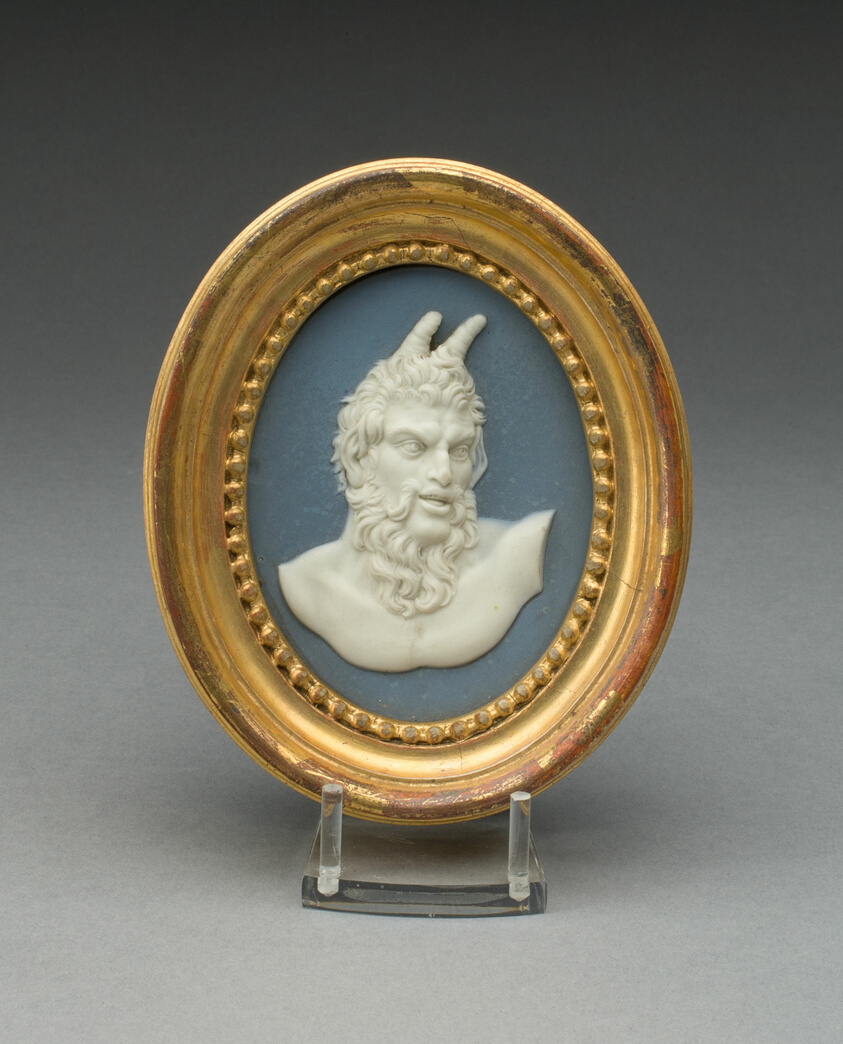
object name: Ceramics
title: Plaque with Head of a Satyr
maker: Wedgwood Manufactory (England, founded 1759)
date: 1770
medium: Stoneware (jasperware)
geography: Burslem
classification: sculpture; stoneware; european decorative arts; ceramics